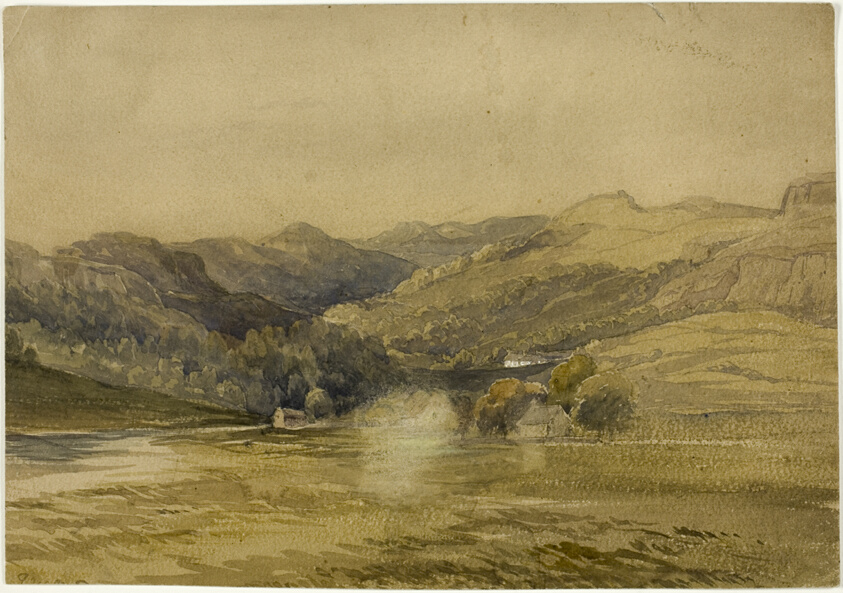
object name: Drawing and Watercolor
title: Valley with Cottages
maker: Attributed to William Bennett; English, 1811-1871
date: c. 1840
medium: Watercolor over traces of graphite, on tan wove card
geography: England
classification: watercolor; drawings (visual works); prints and drawing